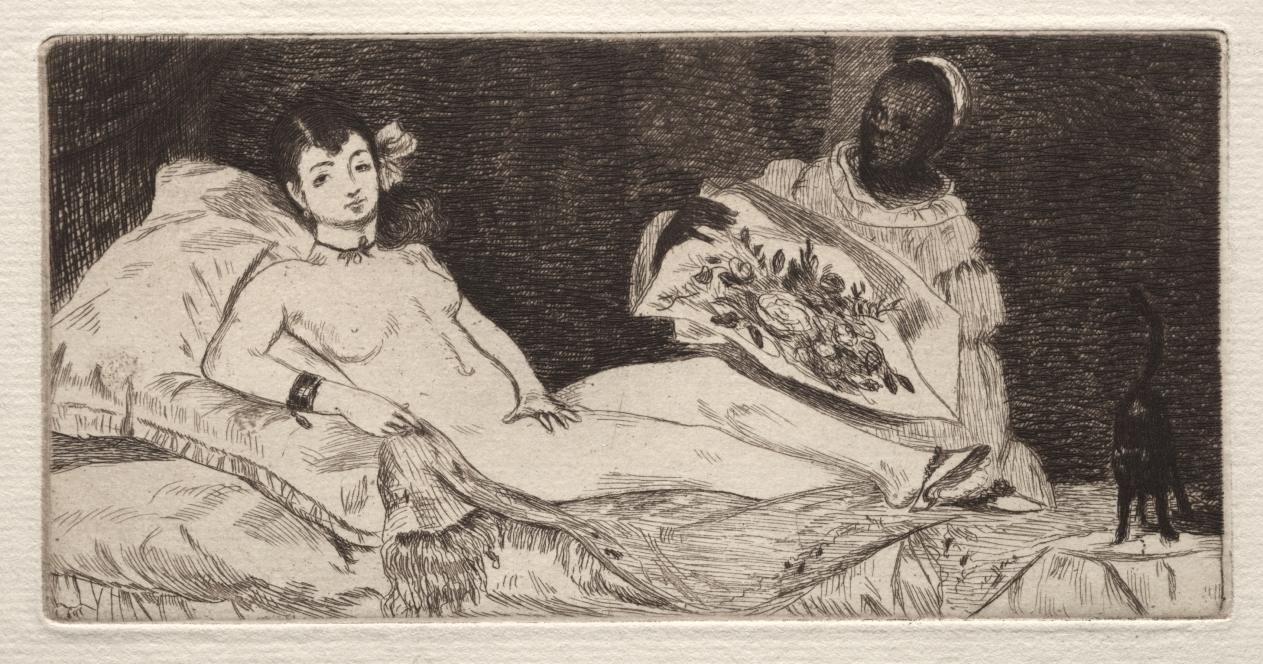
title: Olympia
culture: France, 19th century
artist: Édouard Manet (French, 1832–1883)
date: 1867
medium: etching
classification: Print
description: When Edouard Manet’s painting Olympia was exhibited in Paris in 1865, it was met by the critics and general public with jeers, laughter, criticism, and distain. Manet had depicted his model, Victorine Meurent, as a modern day courtesan, confrontational rather than seductive. Manet’s depiction of a prostitute’s body in a contemporary setting was a radical rejection of the idealized beauty of the traditional female nude. Olympia forced recognition of troubled and contradictory attitudes toward prostitution in the mid-19th century, much to the discomfort of contemporary audiences. The artist made this etching to reproduce his controversial painting.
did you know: Manet's model, Victorine Meurent, was herself a successful painter who showed her work at Paris's salon.